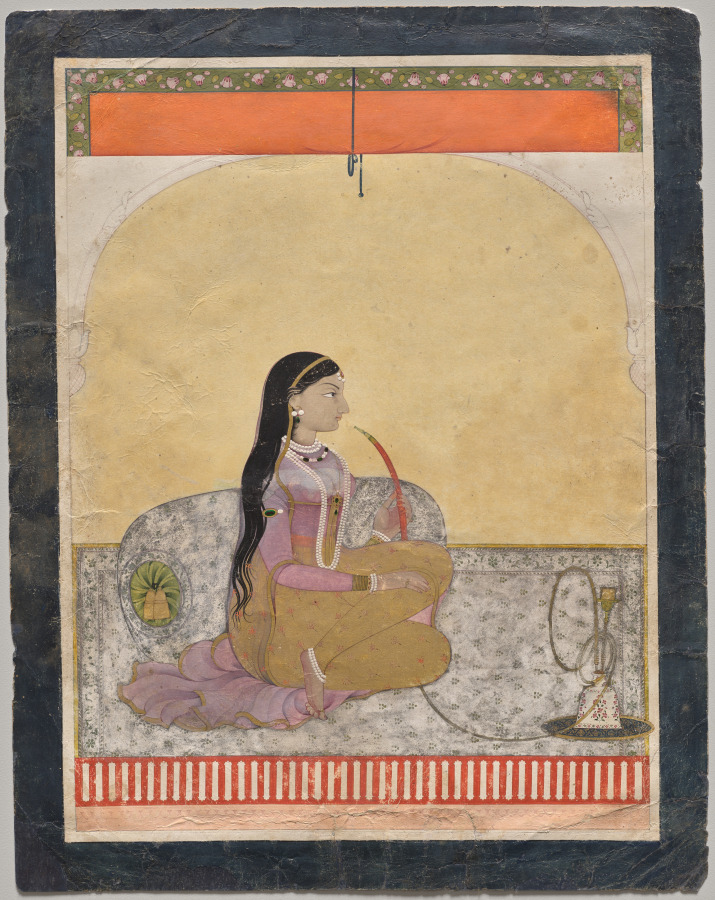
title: Princess smoking a hookah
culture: Northern India, Pahari kingdoms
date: c. 1760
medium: gum tempera, ink, gold, and beetle-wing carapaces on paper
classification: Painting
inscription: Verso: four lines of Persian script on the diagonal: “this picture of B(h)avadnal (a) Sankrhald was obtained from (found in) Biruval, Monday 23….9253.” Bhiruwal is slightly south-east of Lahore city.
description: A lady seated at window smokes a hookah. She wears a translucent lilac blouse and gold trousers and adorns herself with jewelry comprising pearls, gold, and emeralds. Reclining against a large bolster, she is engrossed in smoking her hookah made of gold and porcelain. The painting may have been intended to be presented to the king by the artist.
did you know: The artist has used beetle wings for emeralds in the jewelry.